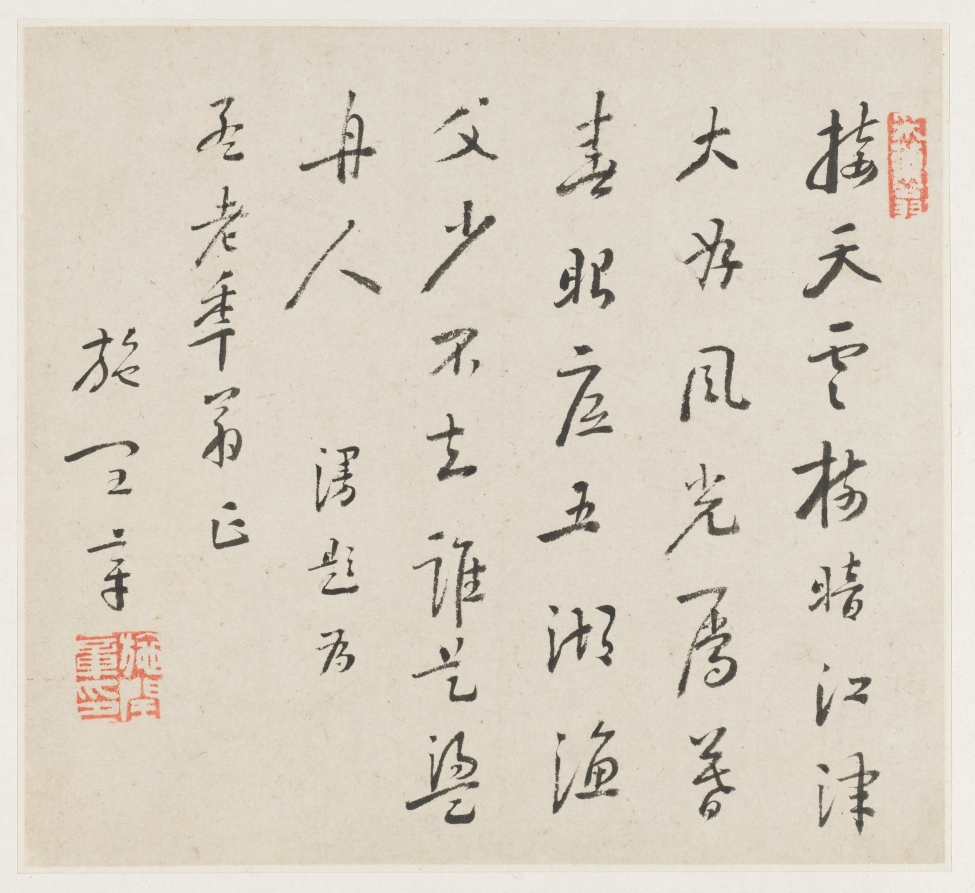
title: Album of Landscapes: Leaf 1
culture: China, Qing dynasty (1644-1911)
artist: Wang Gai (Chinese, active c. 1677–1705)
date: 1677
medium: album leaf, ink and light color on paper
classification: Painting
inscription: Poem by Shih-Jun-chang